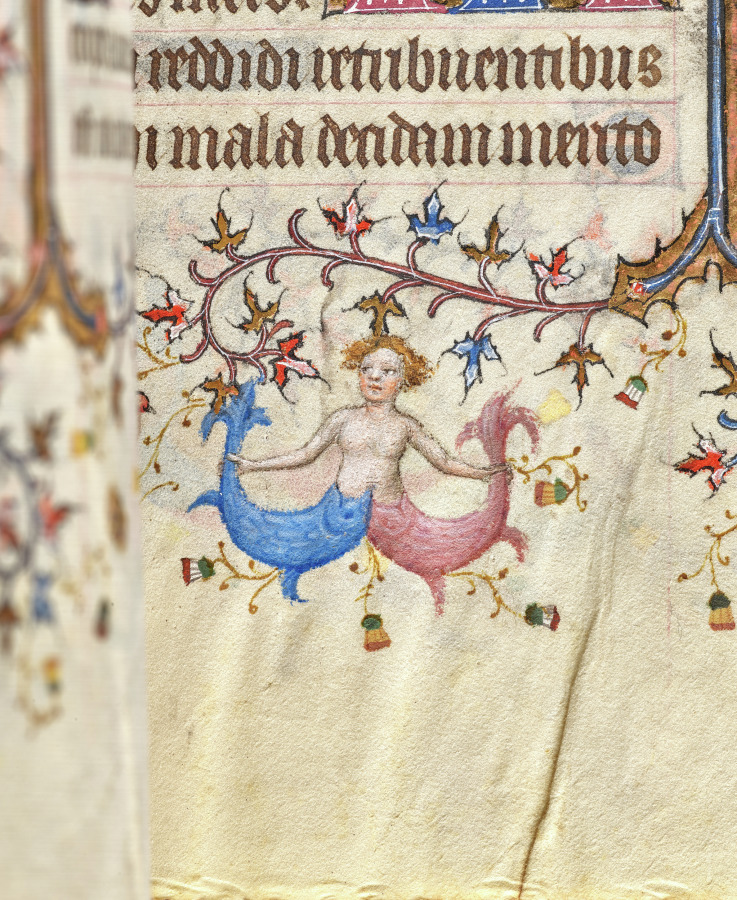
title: Hours of Charles the Noble, King of Navarre (1361-1425): fol. 214r, Text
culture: France, Paris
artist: Master of the Brussels Initials and Associates (French)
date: c. 1405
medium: ink, tempera, and gold on vellum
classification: Bound Volume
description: This precious volume was obviously highly prized by its owner, the French-born King of Navarre, who had his coat of arms painted on no less than twenty folios. Rather than directly commissioning this manuscript from a specific workshop, it seems that Charles the Noble acquired his book of hours -- perhaps ready-made for the luxury market -- while on a trip to Paris in 1404-05. A collaborative effort, six painting styles are evidenced within the pages of this codex, those of two Italians, two Frenchmen, and two Netherlanders. The painter who was responsible for the planning and decoration of the book, and who produced seventeen of the large miniatures, was a Bolognese artist known as the Master of the Brussels Initials. His principal assistant, responsible for most of the borders, was a Florentine who signed his name "Zecho" da Firenze on folio 208 verso.